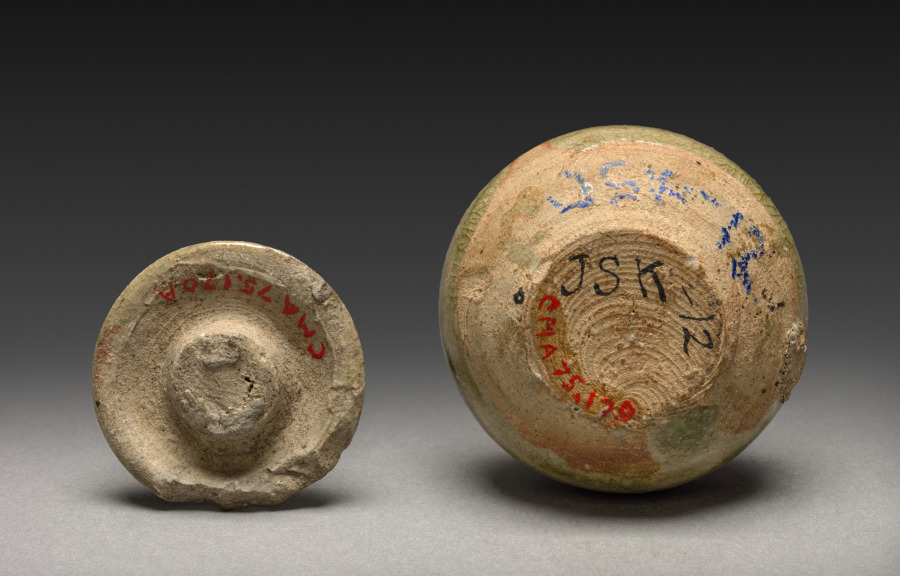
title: Incense Box: Seto Ware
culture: Japan, Kamakura period (1185–1333)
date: 1200s–1300s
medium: glazed stoneware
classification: Ceramic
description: Old Seto, also called Koseto ware, was typically coated with an ash glaze in the mineral feldspar, which produced a yellow or grayish-green glaze. This palette appealed to medieval Buddhist priests and samurai alike. The practice of burning incense in religious, court, and domestic settings dates from the early 700s in Japan.